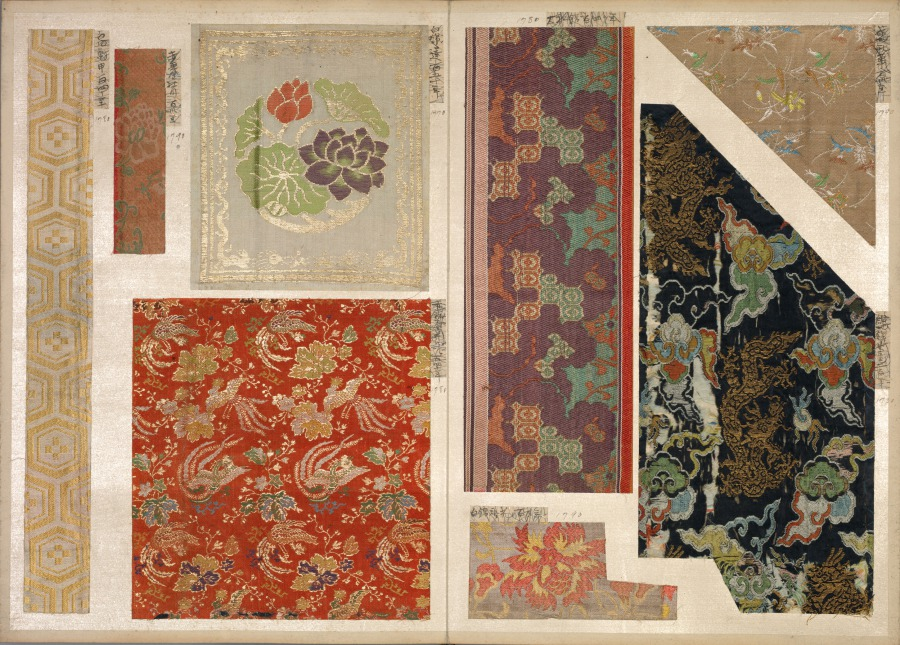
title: Album of Textile Samples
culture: Japan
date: 1790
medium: silk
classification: Textile